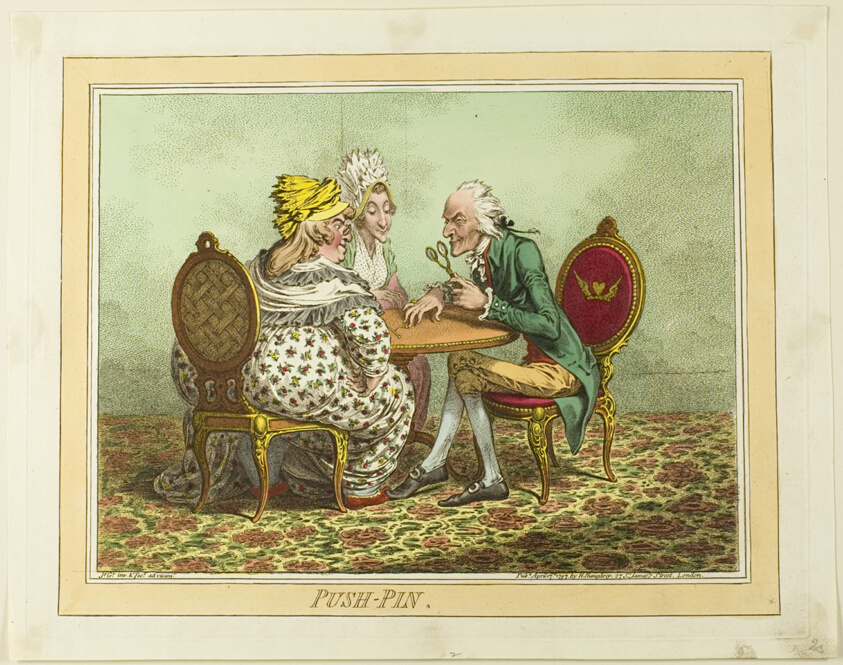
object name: Print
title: Push-Pin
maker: James Gillray (English, 1756-1815); published by Hannah Humphrey (English, c. 1745-1818)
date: published April 17, 1797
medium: Hand-colored etching on paper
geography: England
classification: etching; print; prints and drawing